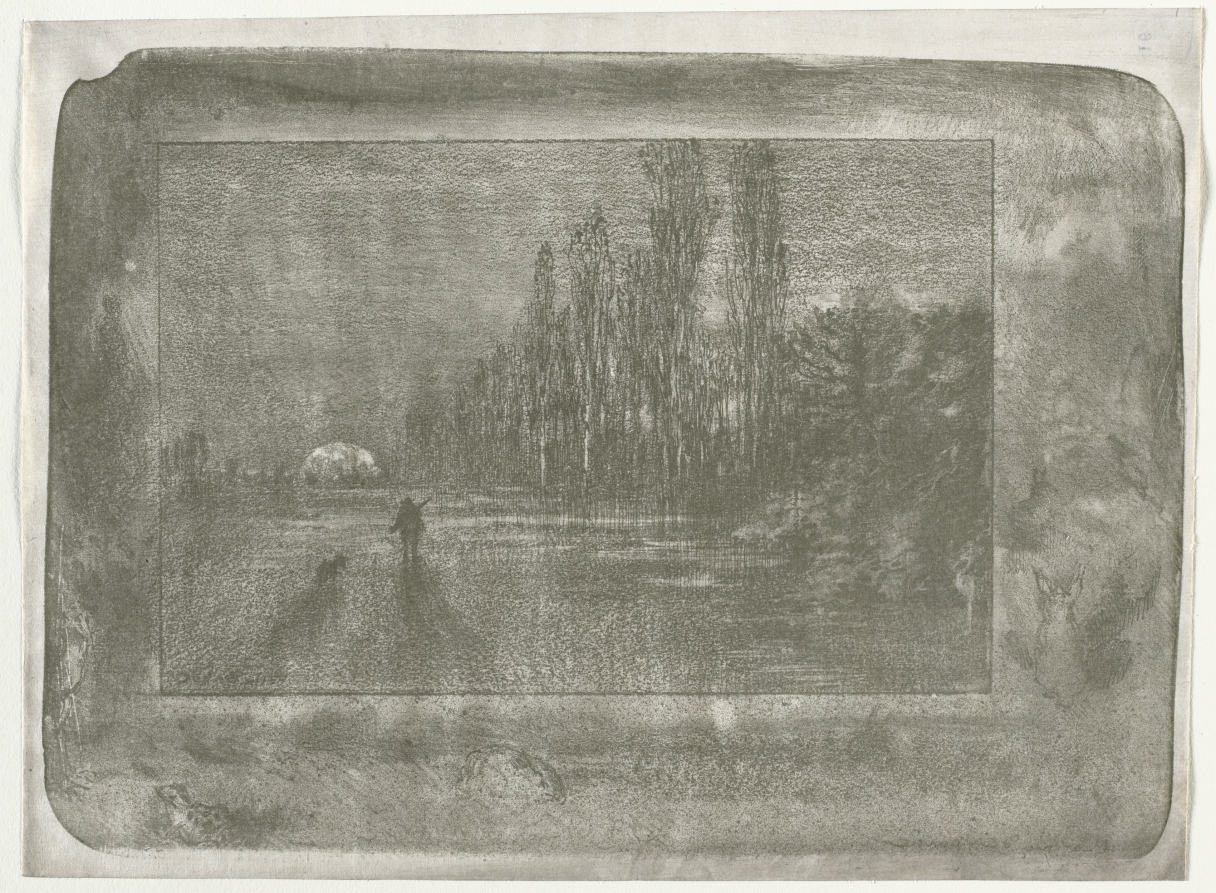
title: The Little Hunter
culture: France, 19th century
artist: Félix Hilaire Buhot (French, 1847–1898)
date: 1892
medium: lithograph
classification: Painting